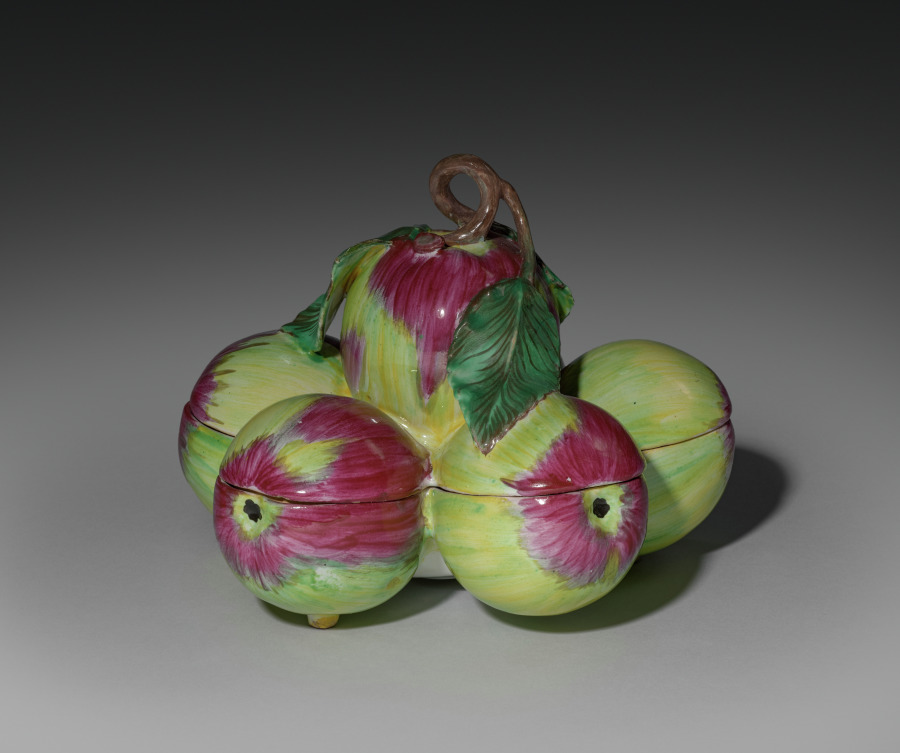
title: Covered Box in the Form of Apples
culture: France, 18th century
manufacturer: Sceaux Factory (French, active 1748–66)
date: c. 1760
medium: Tin- glazed earthenware (faience) wth enamel decoration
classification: Ceramic